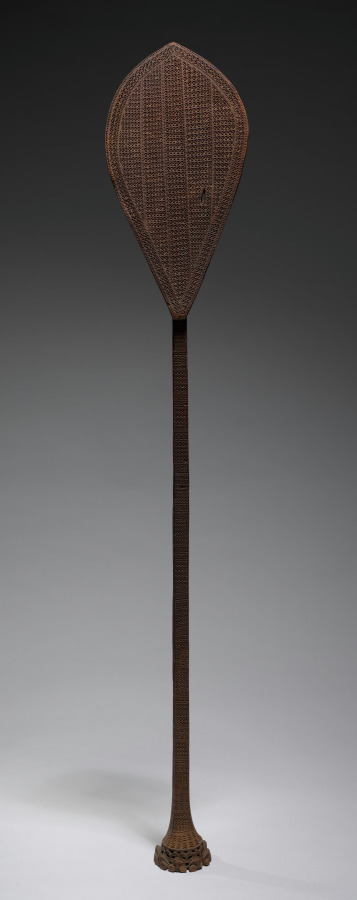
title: Ceremonial Paddle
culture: Polynesia, Ra'ivavae, Austral Islands, 19th century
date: 1800s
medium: wood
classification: Sculpture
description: Fine, chip-carved patterns cover the blades and shafts of Austral Islands ceremonial paddles. Squatting human figures carved around the butt are called tiki tiki tangata, meaning man-gods. The shafts of early paddles are usually round in cross-section; 19th-century examples are sometimes square. The function of the intricately carved Austral Islands paddles is uncertain. They may have been displayed on ceremonial occasions, such as dances, pageants, ancestral rituals, or inaugurations.